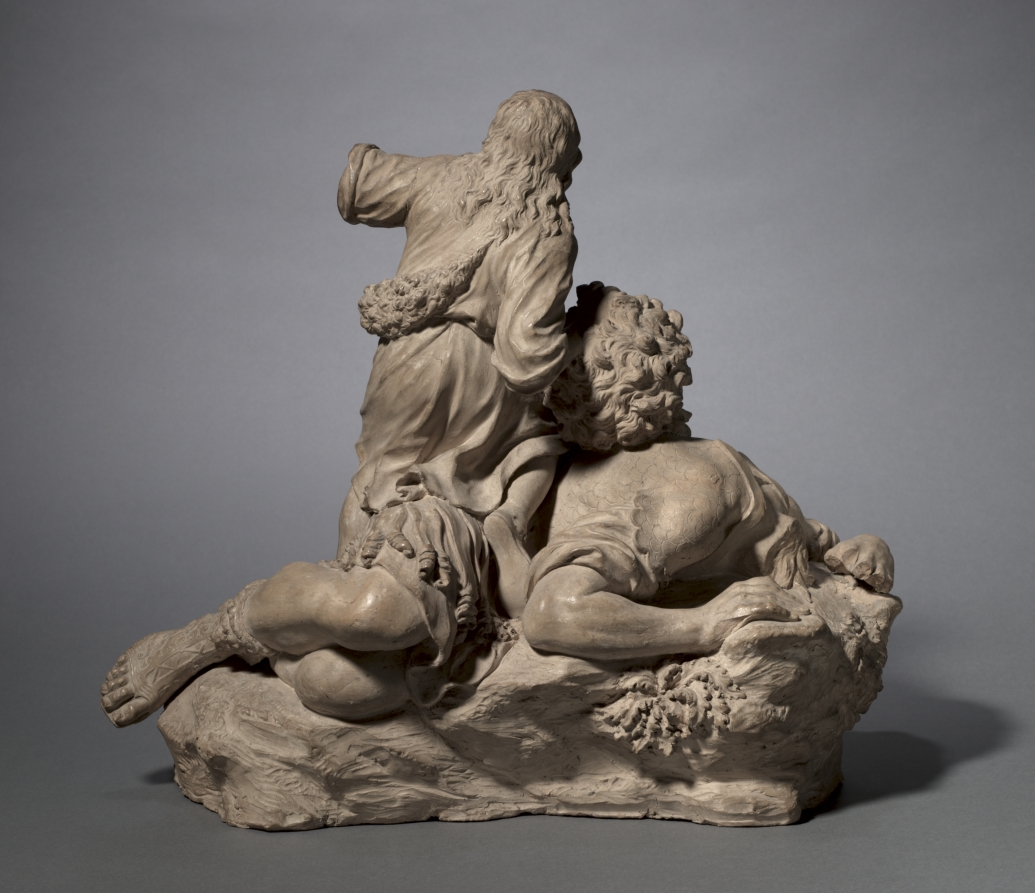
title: David Victorious over Goliath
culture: Italy, Florence, 18th century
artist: Giovanni Battista Foggini (Italian, 1652–1725)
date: 1722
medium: terracotta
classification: Sculpture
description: This terracotta model was used to cast part of a series of bronzes on religious subjects. Foggini depicted David humbly, a compelling contrast to the more traditional Florentine approach of David as a proud victor. The subject of David was especially important because he had long symbolized Florence: the city was often able to overcome its larger rivals, much like David defeated the giant Goliath.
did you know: David was a popular figure in Florentine art and often embodied civic liberty.